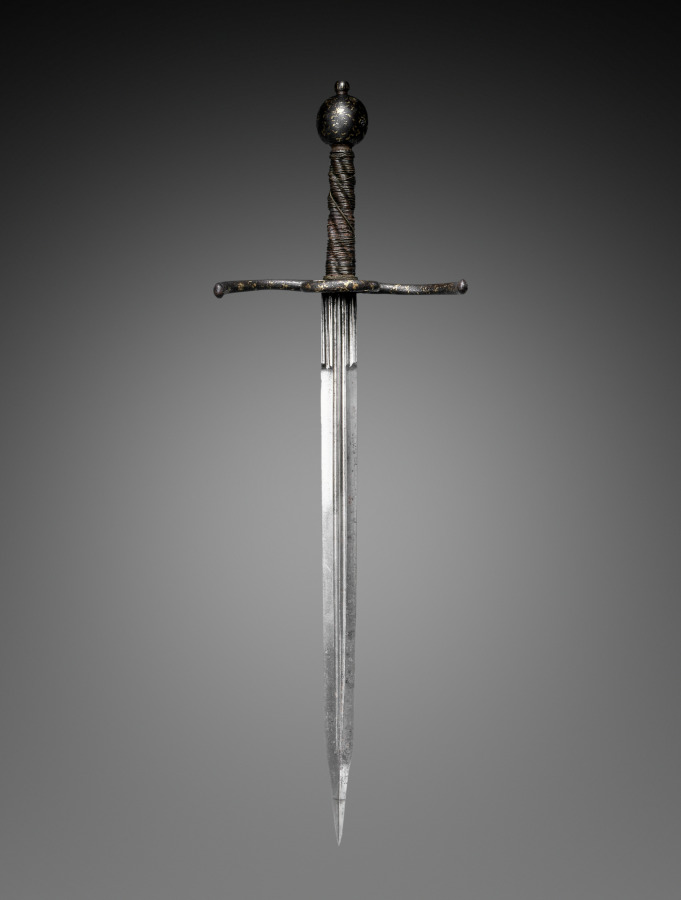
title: Dagger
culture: Italy, 16th century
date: c. 1550–1600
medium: steel; russetted and damascened guard and pommel; wood and wire grip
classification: Arms and Armor